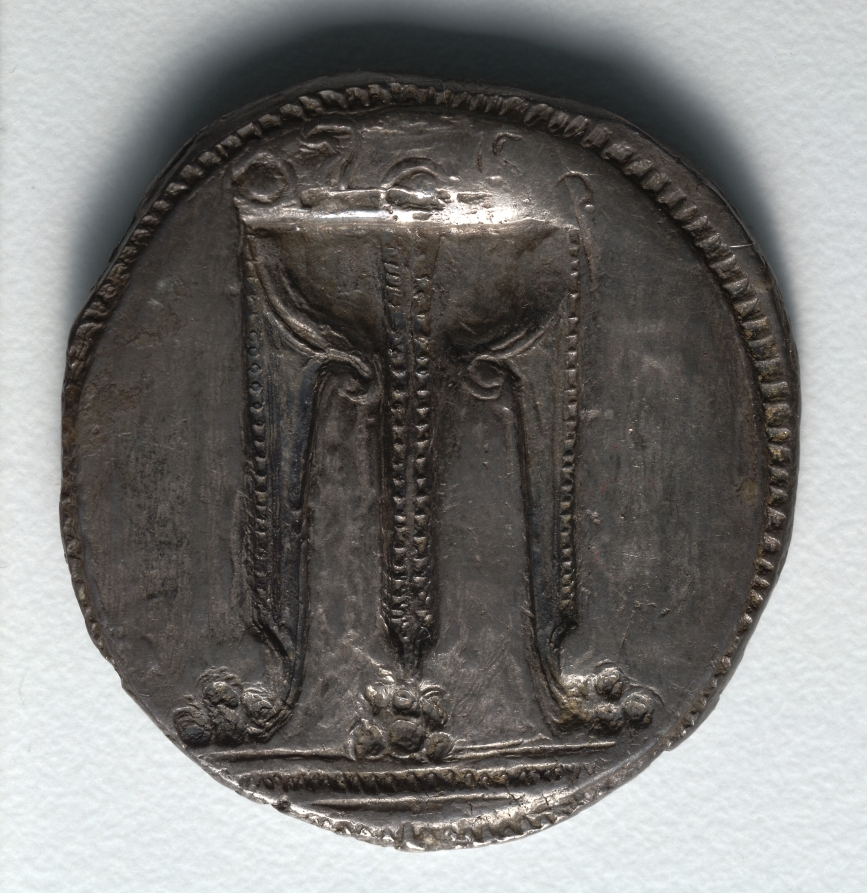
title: Stater: Tripod, Incuse (reverse)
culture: Greek, minted at Kroton (South Italy)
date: c. 530–510 BCE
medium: silver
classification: Coins